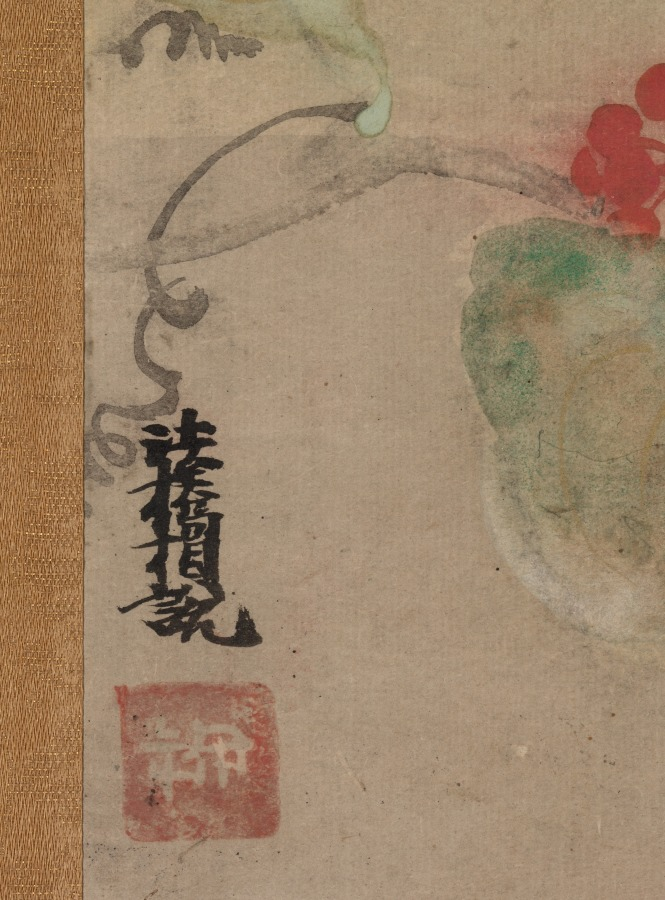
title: Summer Flowers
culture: Japan, Edo period (1615–1868)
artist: Kitagawa Sōsetsu (Japanese, active 1639–50)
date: mid-1600s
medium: hanging scroll; ink, color, and gold on paper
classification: Painting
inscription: 法橋相説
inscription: Seal: 印年 (Inen)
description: White hydrangea, orange-colored demon’s lantern, and greenbrier vine appear together in this scroll. The artist used the dripping-in (tarashikomi) technique to create a sense of depth and dimension in the leaves of the plants. A carefully controlled brush loaded with a high ratio of water to ink or color is key to the success of this brush method. Gold lines indicate the veins of leaves and the seams of pods.